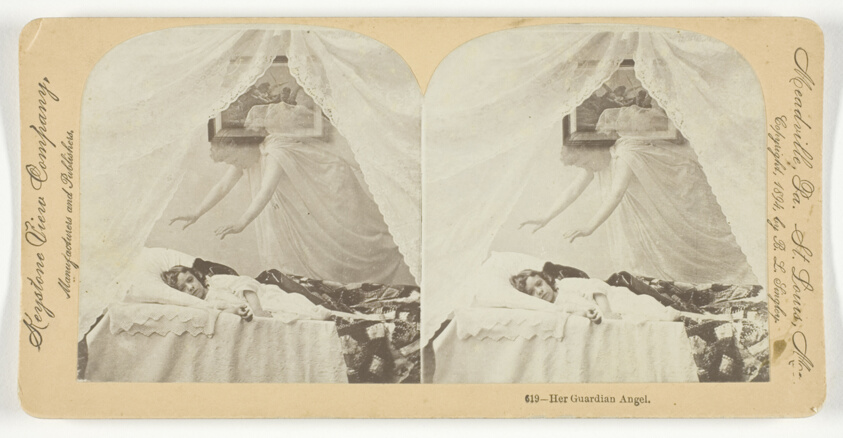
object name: Photograph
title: Her Guardian Angel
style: 19th century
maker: Keystone View Company; American, 1892-1963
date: 1894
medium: Albumen print, stereo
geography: Saint Louis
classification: photography; photograph; albumen silver print; stereograph (albumen)